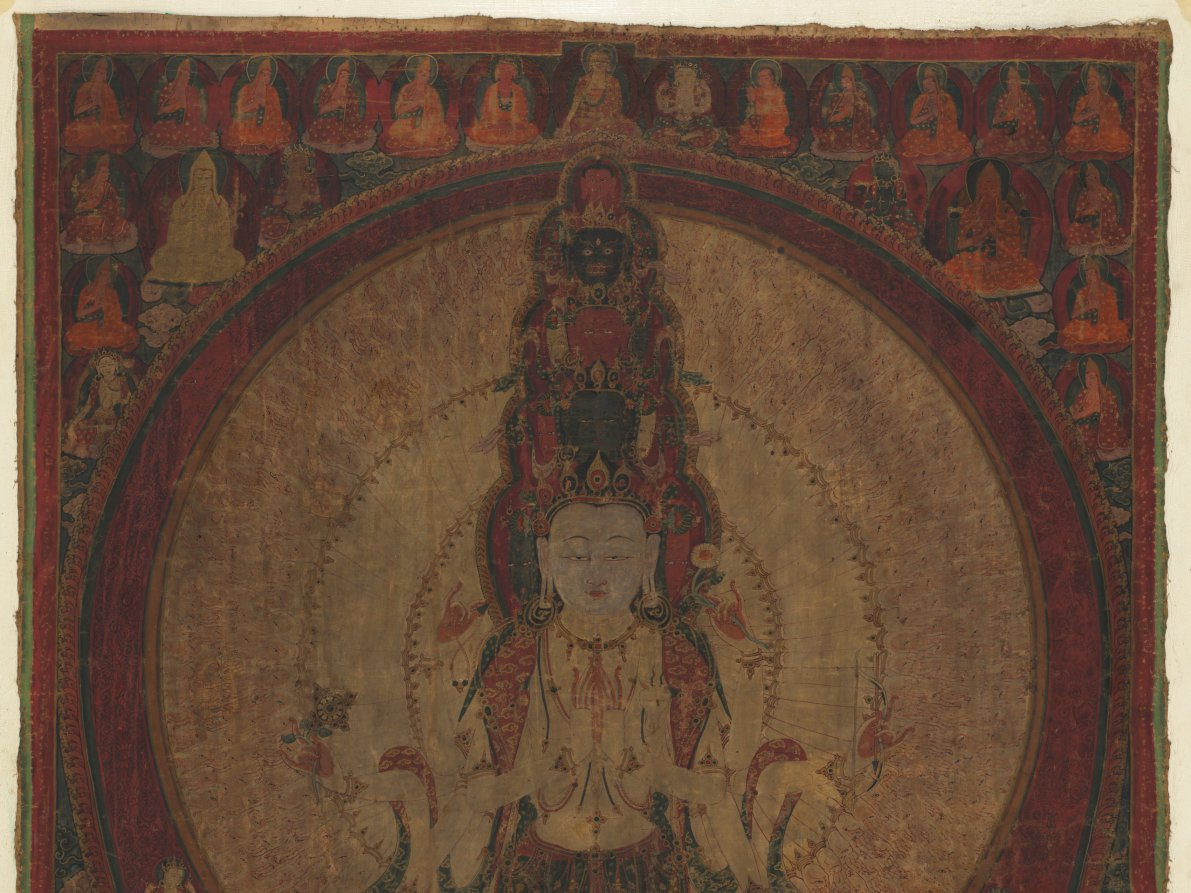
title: Eleven-Headed, Thousand-Armed Bodhisattva of Compassion (Avalokiteshvara)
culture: Western Tibet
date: c. 1500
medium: Gum tempera and ink on cotton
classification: Painting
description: One thousand arms surround the central figure like a radiating halo. Each hand has an eye in the palm to see the suffering of all beings, generating the sense of compassion that this figure embodies. The special form of the central image of the bodhisattva Avalokiteshvara derives from the mystic vision of a nun named Gelongma Palmo, who was born a Kashmiri princess, but prayed for leprosy to avoid having to marry and became an accomplished nun. While meditating in a cave, she achieved this vision of 11-headed, 1,000-armed Avalokiteshvara, who cured her leprosy and guided her on the path to enlightenment.